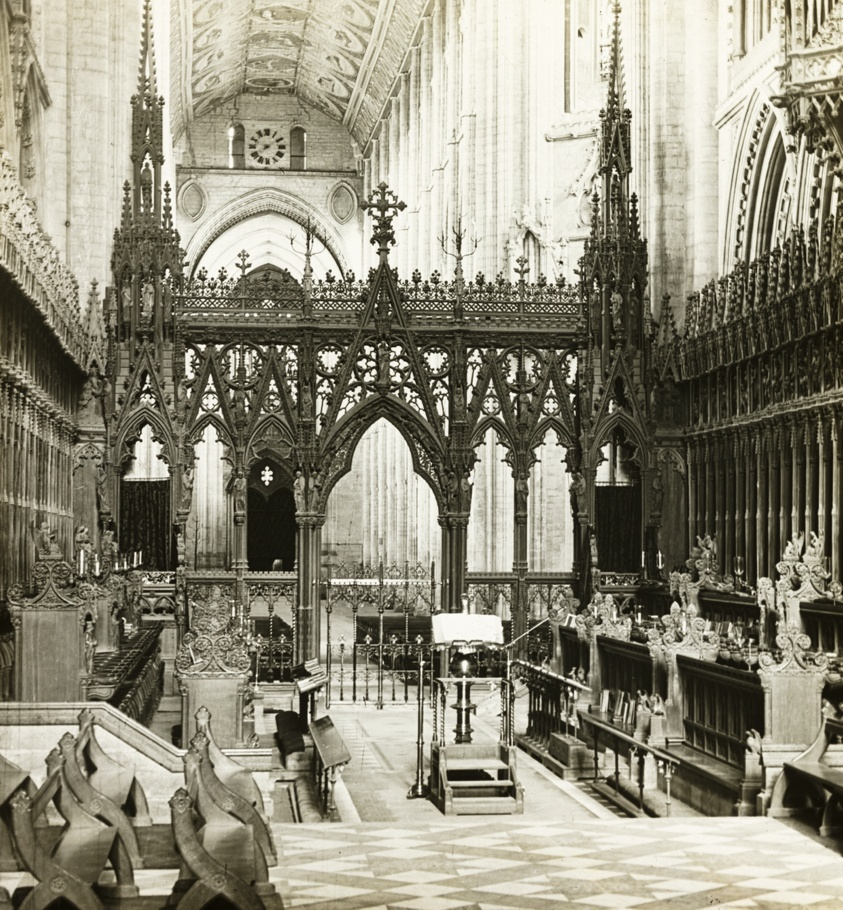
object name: Photograph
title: Ely Cathedral: Choir to West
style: Pictorialism, 19th century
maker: Frederick H. Evans (English, 1853–1943)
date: 1891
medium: Lantern slide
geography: England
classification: photograph; photography